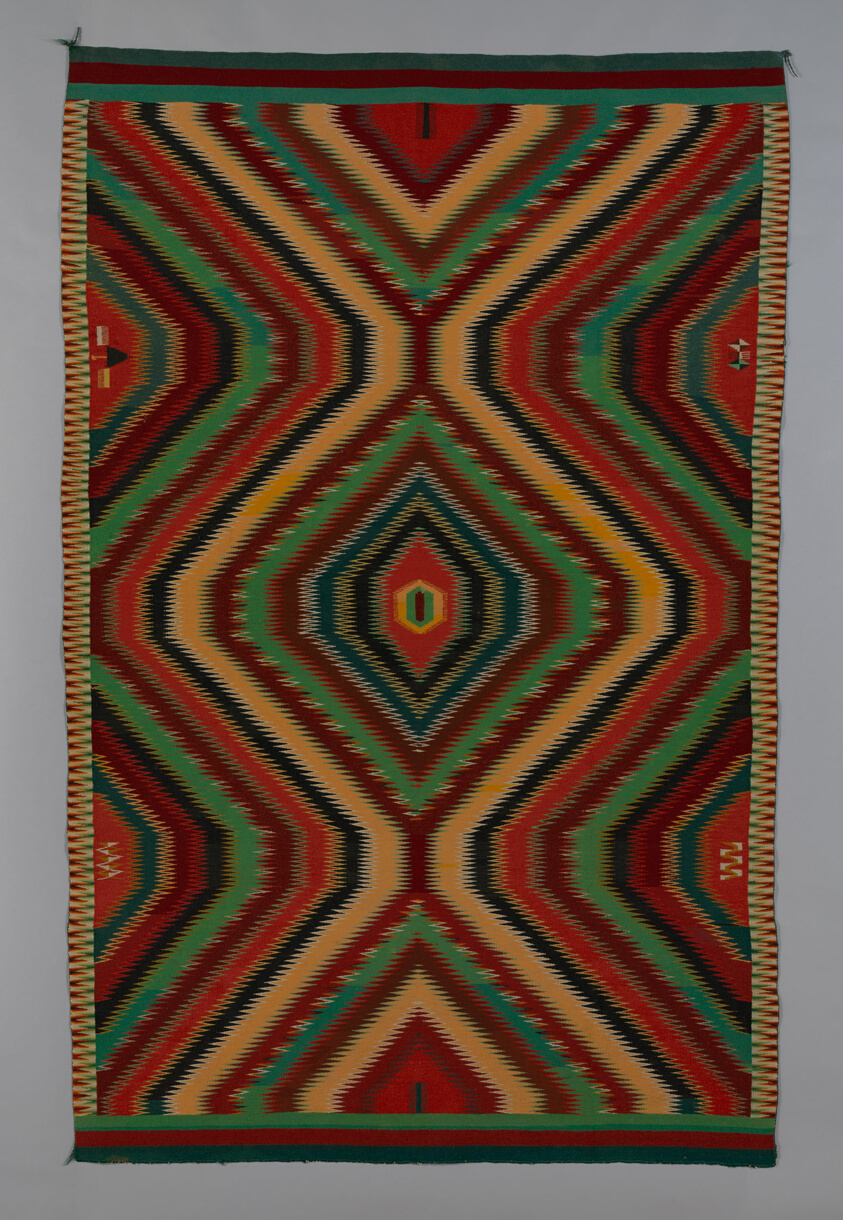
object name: Textile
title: Blanket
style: navajo, native american, americas, Folk Art, indigenous, north american, native north american, eye-dazzler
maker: Navajo (Diné) (Arizona, New Mexico, and Utah, United States)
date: 1880s/90s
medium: Cotton and wool, single interlocking tapestry weave; twined selvages and heading, overcast finish terminating in tassels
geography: Navajo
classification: textile; weaving